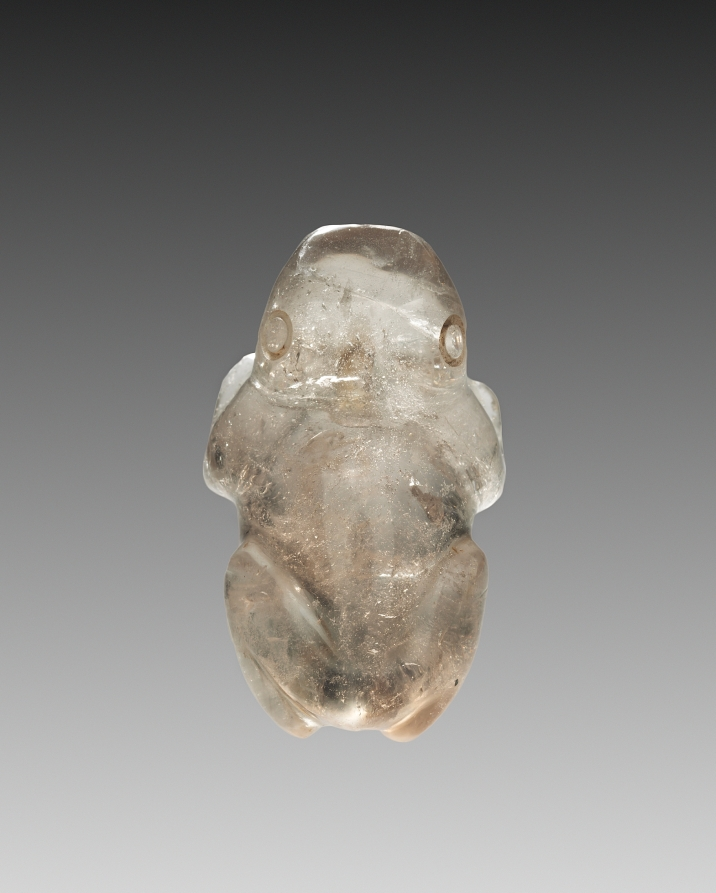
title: Frog Pendant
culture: Mesoamerica, Mexico, Guerrero, Mezcala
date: 100 BCE–300 CE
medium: rock crystal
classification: Sculpture